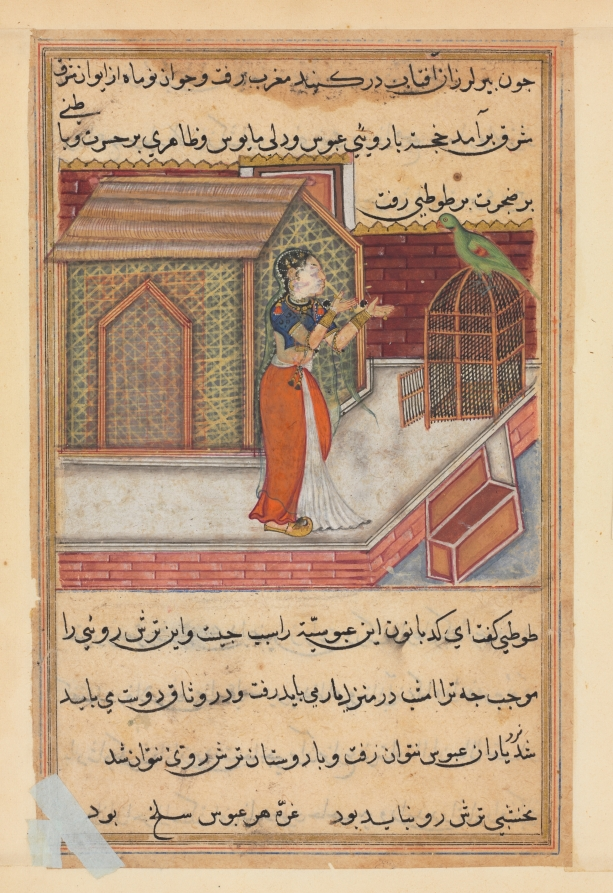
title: The parrot addresses Khujasta at the beginning of the forty-ninth night, from a Tuti-nama (Tales of a Parrot): Forty-Ninth Night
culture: Mughal India, court of Akbar (reigned 1556–1605)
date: c. 1560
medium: gum tempera, ink, and gold on paper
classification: Painting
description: On the forty-ninth of fifty-two nights, Tuti the wise, talking parrot tells Khujasta a moralizing story about three brothers, two of whom aged prematurely, while the third remained young. The story lasts until sunrise, and Khujasta is unable to leave to visit her lover.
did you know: The original underdrawing is visible where the paint has flaked from Khujasta’s face.